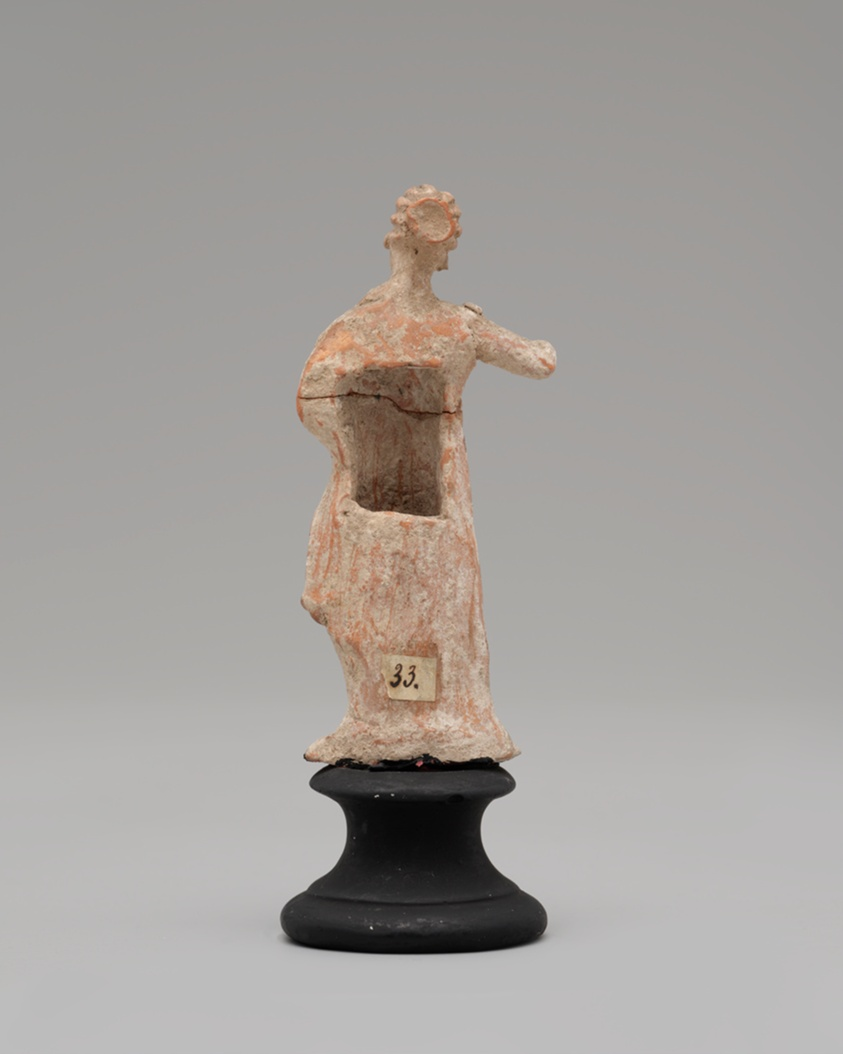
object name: Sculpture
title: Figurine of a Standing woman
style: greek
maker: Greek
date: 4th-3rd century BCE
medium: terracotta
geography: Greece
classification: earthenware; ceramics; sculpture; ancient art